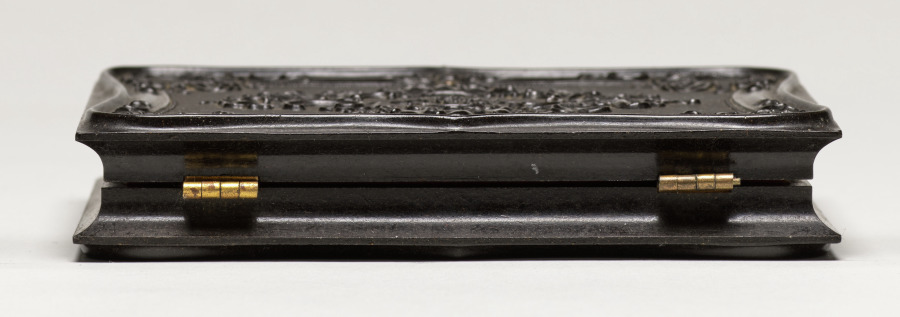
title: Child with Drum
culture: America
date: 1850s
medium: daguerreotype, quarter-plate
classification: Photograph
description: For this finely toned daguerreotype, an unknown photographer skillfully manipulated a bulky camera into a low vantagepoint, ensured even lighting, and positioned the quaintly dressed subject against a neutral background to create a charming portrait. The child was carefully coached to stare directly into the lens and to hold the toy drum and drumsticks convincingly. Perhaps the drum is meant to recall earlier times in American history and to symbolize its fight for independence.